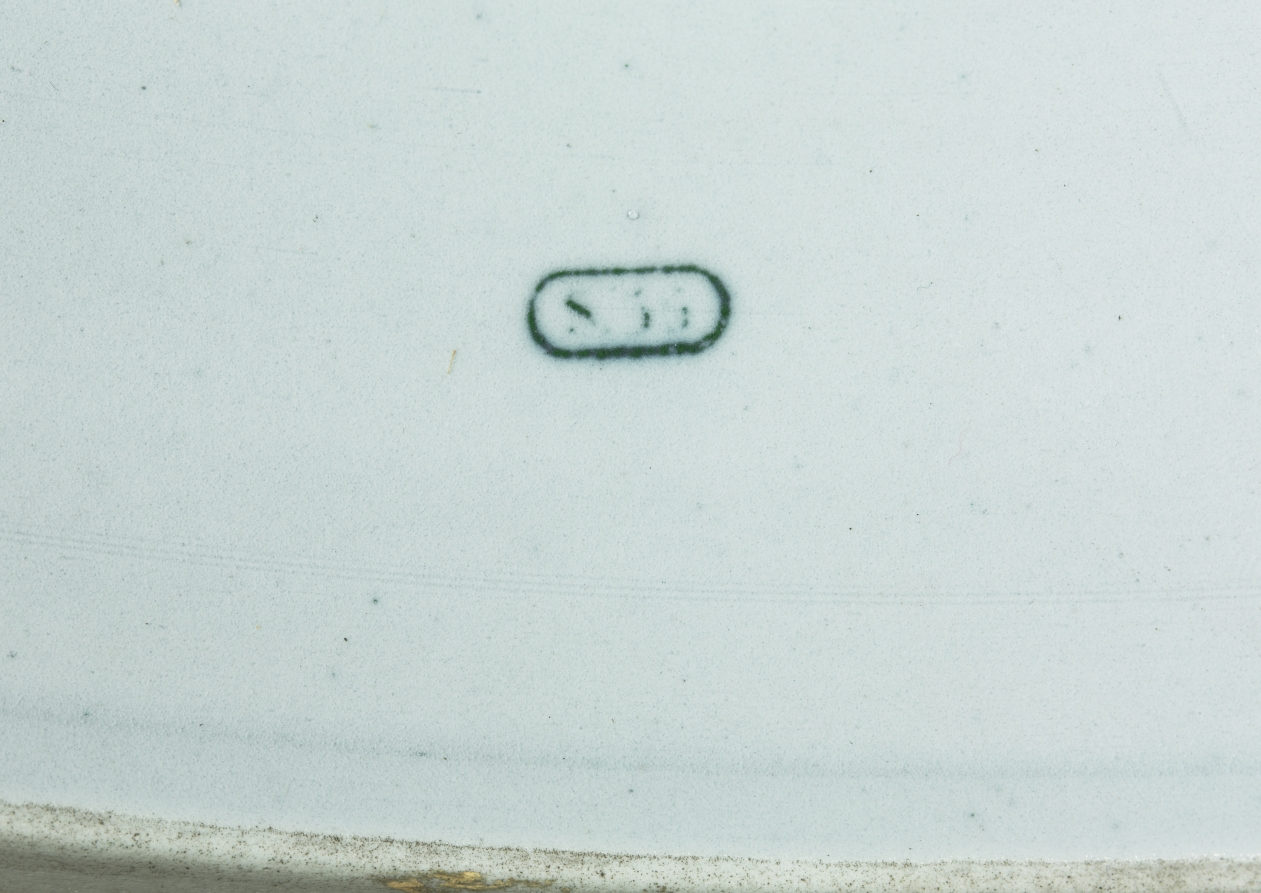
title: Vase Bertin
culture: France, 19th century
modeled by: Jules-Constant Peyre (French, 1811–1870?)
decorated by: Léopold Jules Gély (French)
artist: Sèvres Porcelain Factory (French, est. 1756)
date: c. 1855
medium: porcelain with pâte-sur-pâte decoration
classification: Ceramic